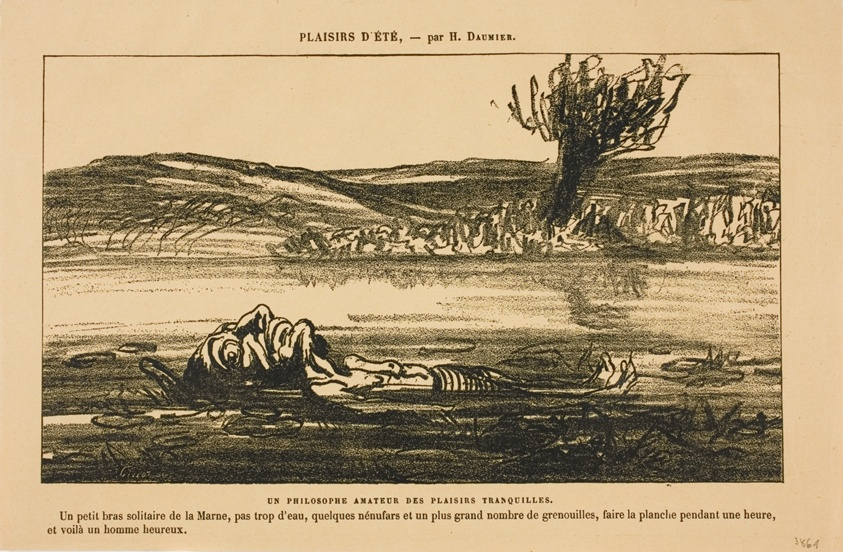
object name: Print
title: Philosophical Contemplations of a Lover of Silent Pleasures. To float on the back for an hour in a quiet tributary of the Marne with little water, some water lilies and lots of frogs: that's what makes a man happy!, from Les Baigneurs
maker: Honoré Victorin Daumier (French, 1808-1879); printed by Firmin Gillot (French, 1820-1872)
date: 1864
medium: Lithograph in black on tan wove paper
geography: France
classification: lithograph; print; prints and drawing